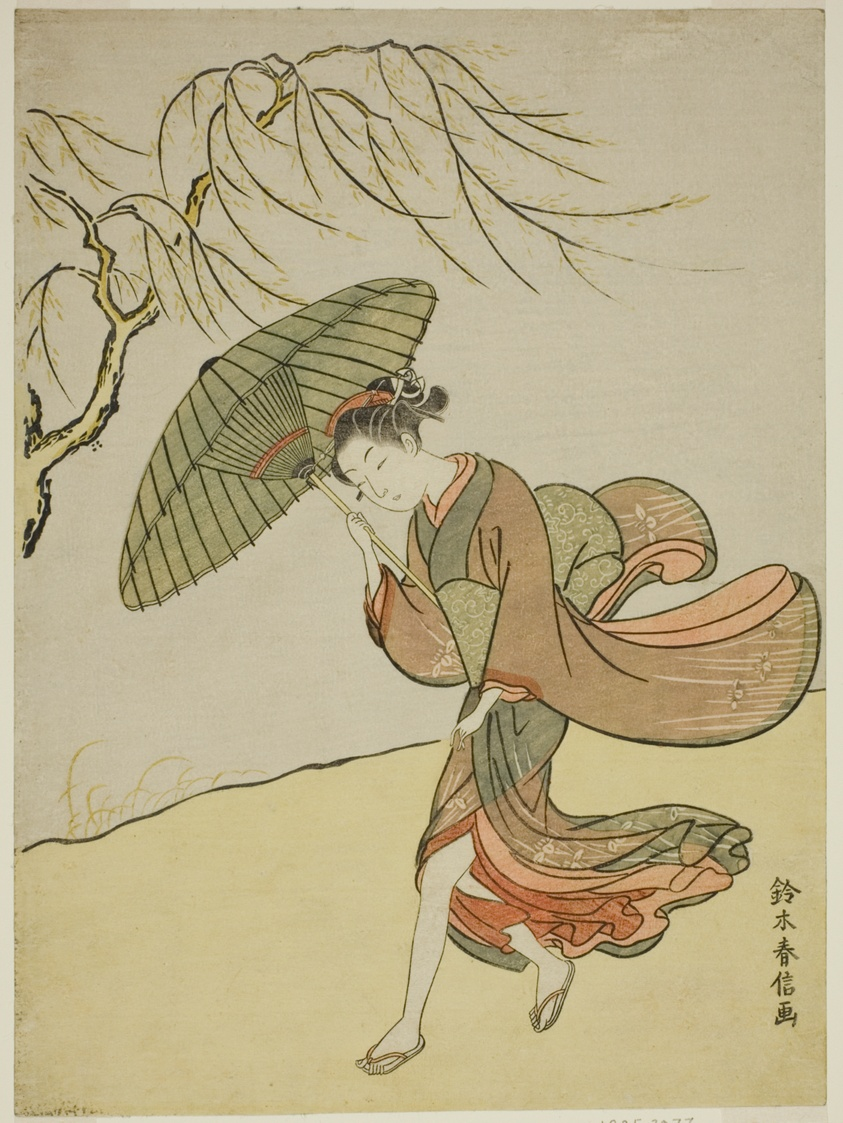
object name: Print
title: A Windy Day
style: Japanese (culture or style)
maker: Suzuki Harunobu 鈴木 春信; Japanese, 1725 (?)-1770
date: c. 1767/68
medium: Color woodblock print; chuban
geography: Japan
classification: woodblock print; print; asian art